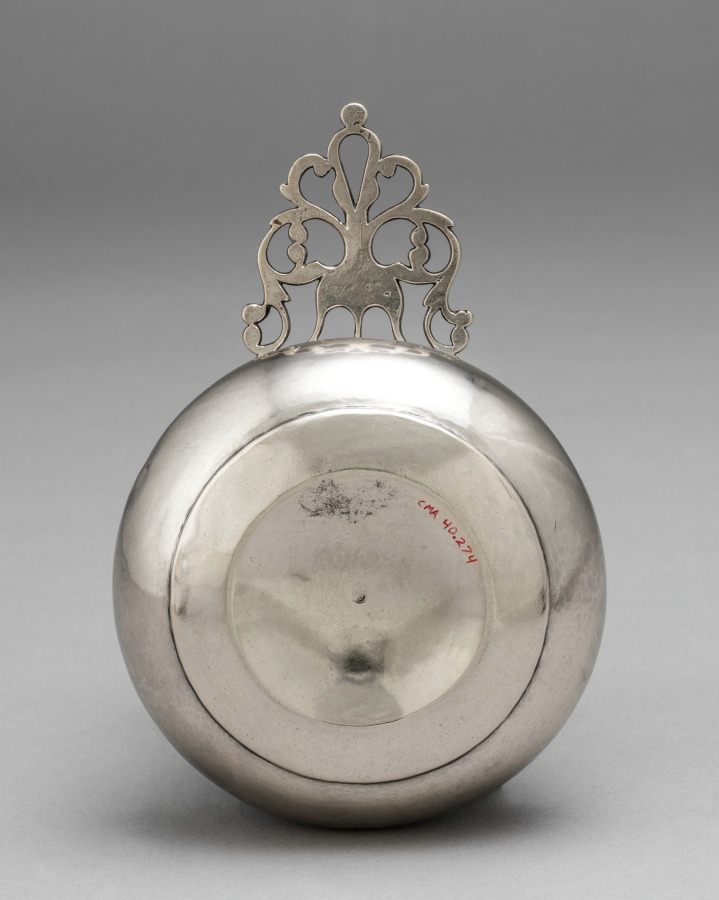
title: Porringer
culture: America, Massachusetts, Boston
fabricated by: Andrew Tyler (American, 1692–1741)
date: c. 1725–30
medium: silver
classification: Silver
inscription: engraved "MC" in block letters on top of handle (facing away from bowl). Scratched underneath handle: "8..12."